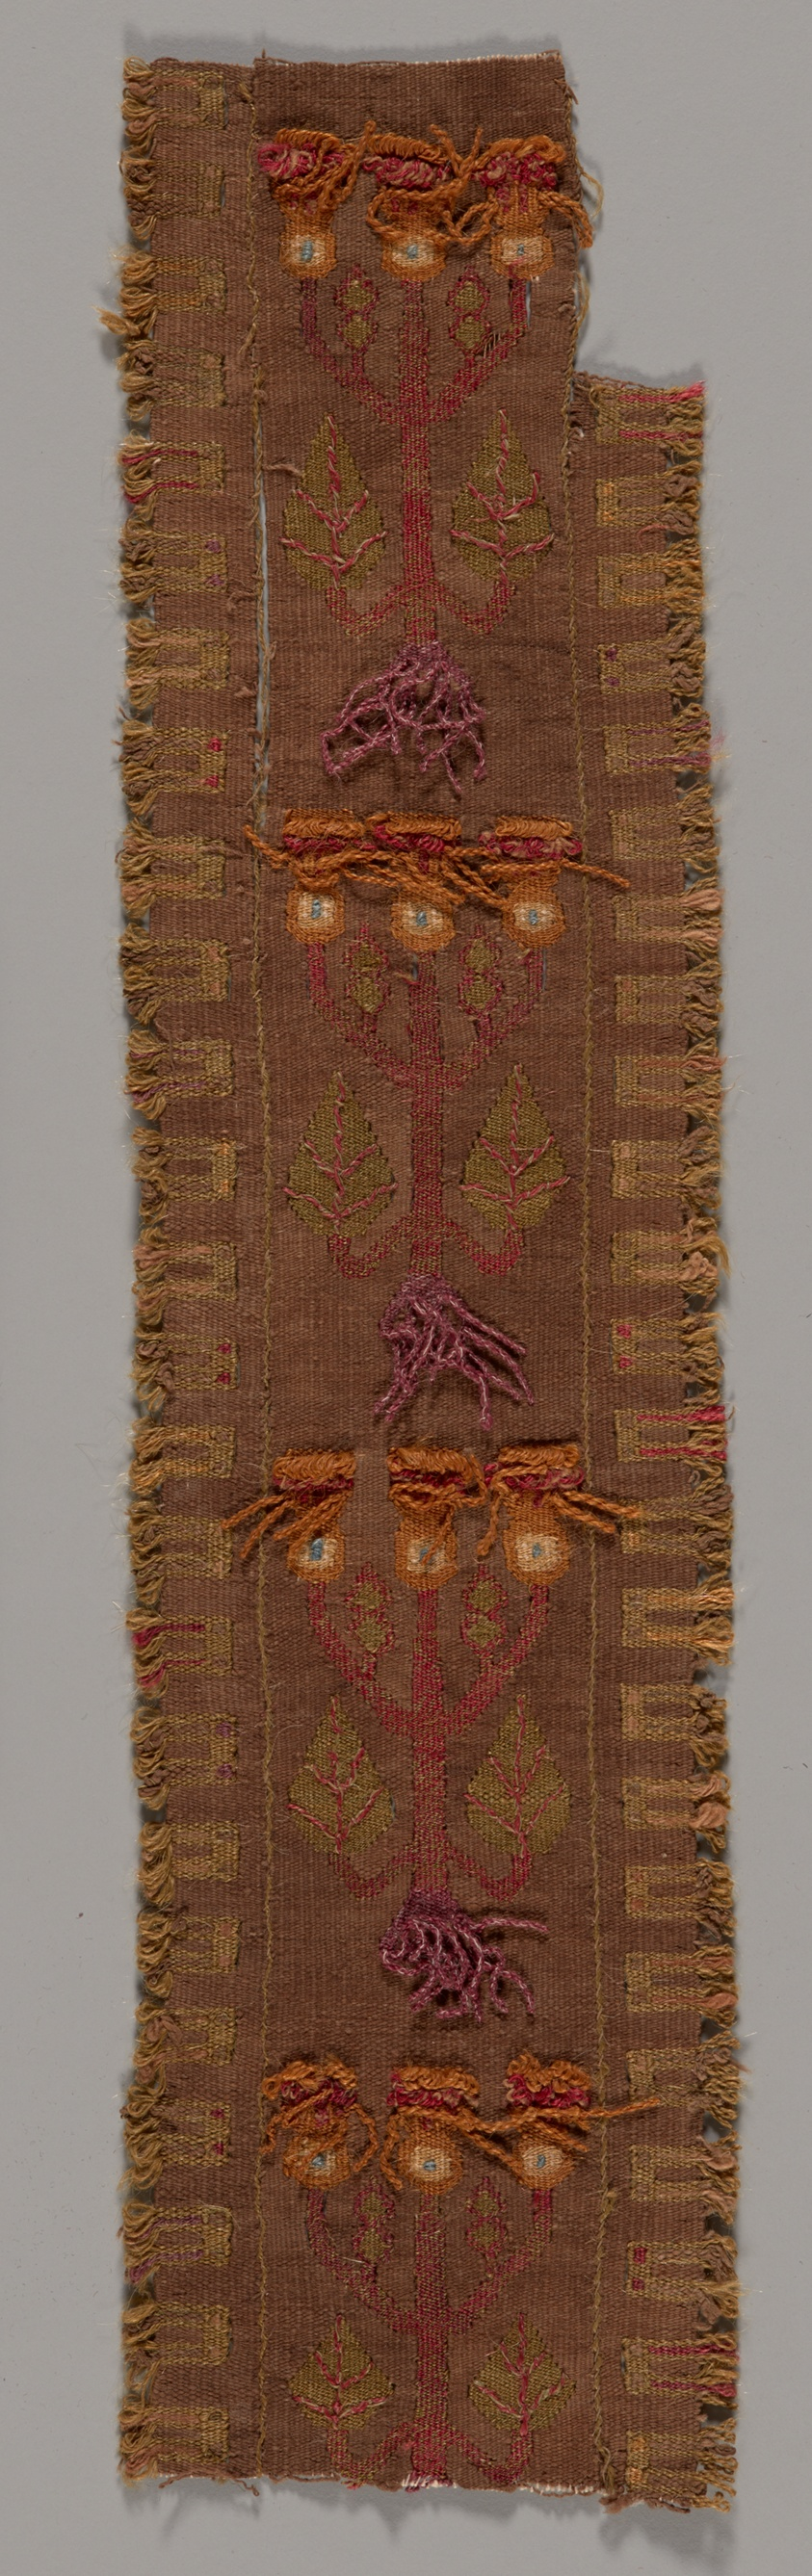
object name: Textile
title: Band Fragments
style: lambayeque, Pre-Columbian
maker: Lambayeque (North coast, Peru)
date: 1000/1476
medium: Cotton and wool (camelid), slit tapestry weave with eccentric wefts, uncut weft loop pile, extended uncut looped and plied weft fringes; embroidered with cotton and wool (camelid) with laid-in couching; and selvage weft loop fringe; three segments joined by overcast couching stitch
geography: Peru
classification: textile; weaving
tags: super/natural